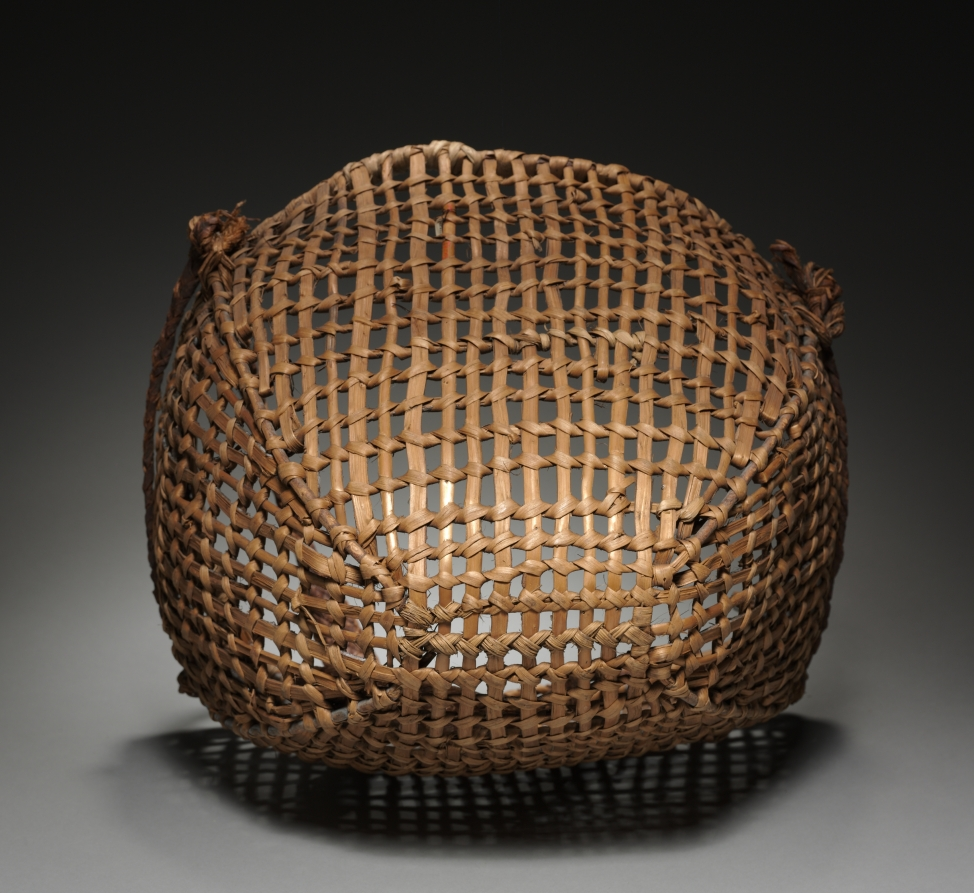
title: Clam basket with Tump Line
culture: Northwest Coast, Klallam, late 19th century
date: late 1800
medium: Cedar root; openwork, braided, plaited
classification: Basketry